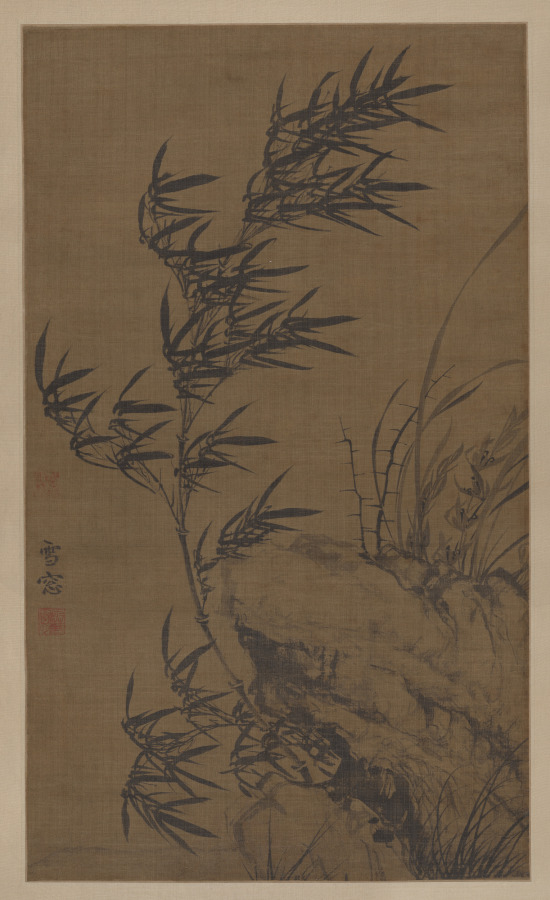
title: Bamboo in the Wind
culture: China, Yuan dynasty (1271-1368)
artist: Puming (Xuechuang) (Chinese, active before 1274-after 1329)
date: 1300s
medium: Hanging scroll; ink on silk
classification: Painting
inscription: Artist's signature and 2 seals, all reading: Xuechuang 雪窓.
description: Bamboo is an evergreen plant that does not break under the weight of snow or the force of the wind, and thus became a favorite motif in literati painting and Chan Buddhism as a metaphor for the virtue of not yielding to worldly temptations. Xuechuang, also known as monk Puming, was a native of Songjiang, near Shanghai, who spent his life as a monk in Suzhou. In 1338, he presided over Yunyan temple on Tiger Hill. Here, he masterfully depicts a bamboo gently bent in a subtle breeze. Puming’s paintings were revered in Japan and Korea.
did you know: Bamboo, pine, and plum, often referred to as the "three friends of winter," are popular motifs in Chinese literati art.